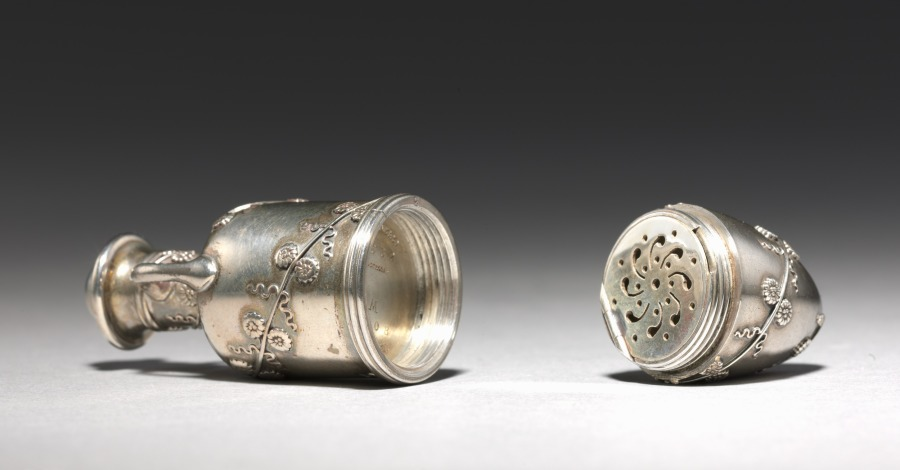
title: Scent Bottle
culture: America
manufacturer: Tiffany & Co. (America, New York, est. 1837)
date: c. 1860–70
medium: silver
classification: Silver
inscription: Inside mark: Tiffany & Co. 2662 (...) - this is too small to read M2108 Union Square